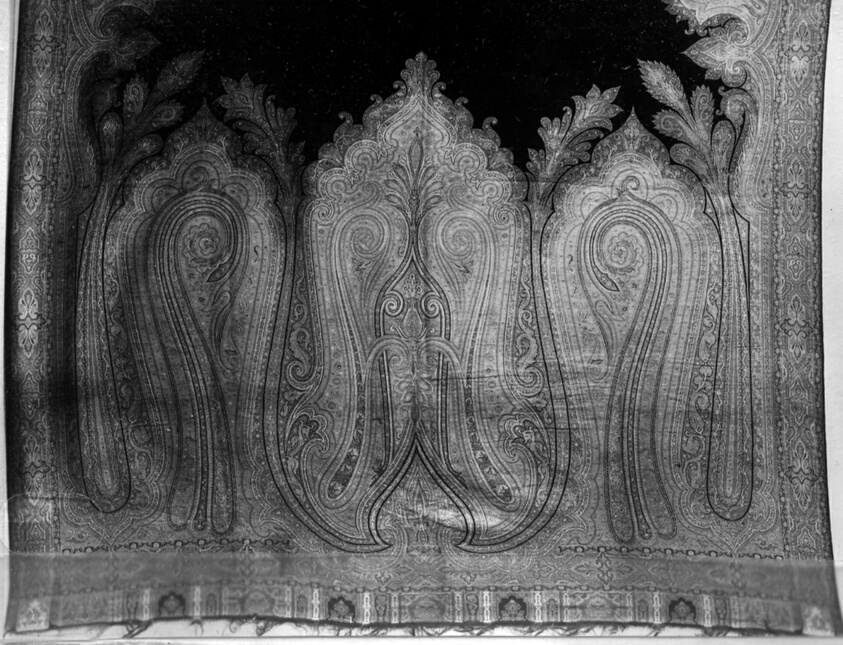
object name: Costume and Accessories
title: Shawl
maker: Scotland, Paisley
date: 19th century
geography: Paisley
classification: textile; weaving; costume; costume accessory; dress (garment); clothing